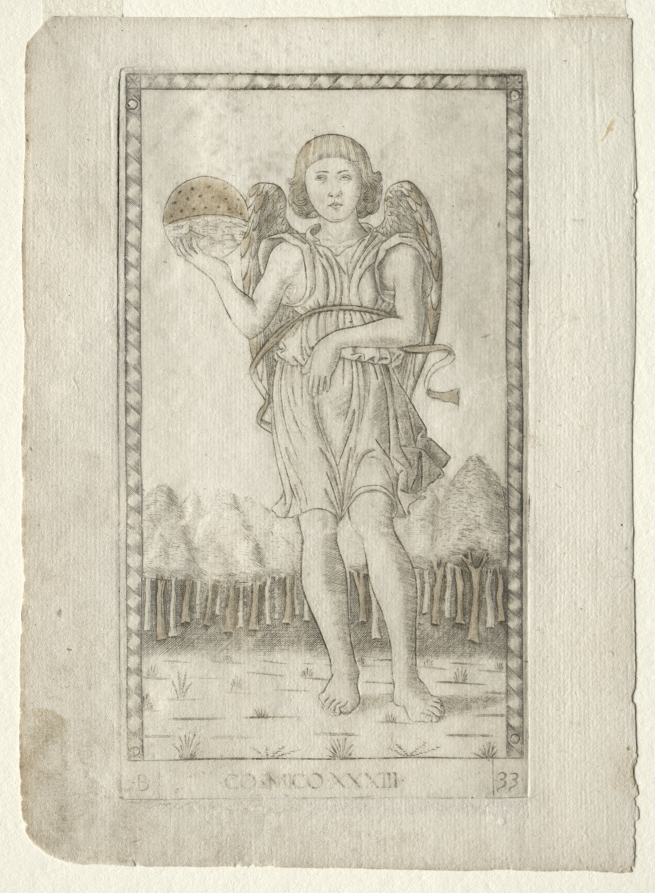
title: Genius of the World (from the Tarocchi, series B: Cosmic Principles & Virtues, #33)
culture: Italy, Ferrara, 15th century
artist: Master of the E-Series Tarocchi (Italian, active 1460s)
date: before 1467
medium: engraving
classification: Print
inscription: Lettered below the image of Cosmico (Genius of the World): ·B· / ·COSMICO·XXXIII· / ·33·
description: This engraving is part of the group marked with the letter “B,” and named Cosmic Principles and the Virtues, which comprises the three Universal principles or Genii (Light, Time, and Space) alongside the four cardinal virtues (Prudence, Temperance, Fortitude, and Justice) and the three theological ones (Faith, Hope, and Charity). The three allegorical figures of the Genii open group B and appear to be an artistic invention of the author of the Tarocchi series. Here, Cosmico (Genius of the World) is personified as a full-length winged male youth, in frontal view. Behind him is a forest. In his right hand, Cosmico holds up a celestial sphere.